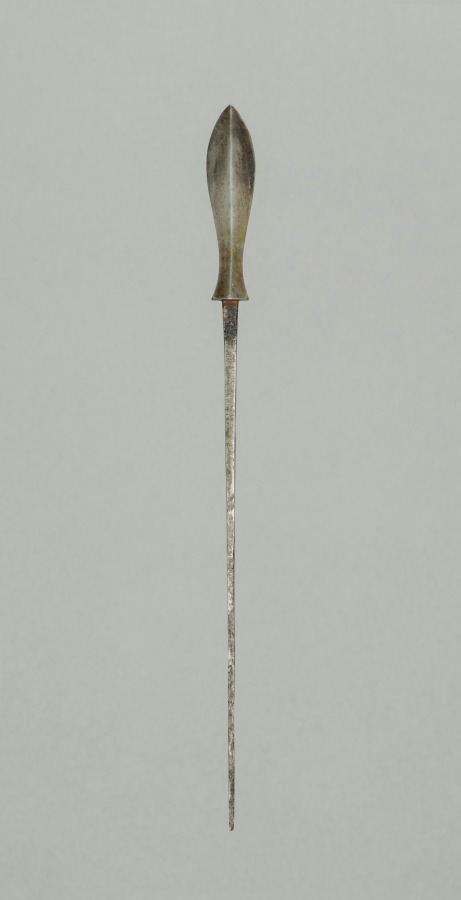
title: Arrow Point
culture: Japan, Edo period (1615–1868)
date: 1700s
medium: steel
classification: Arms and Armor